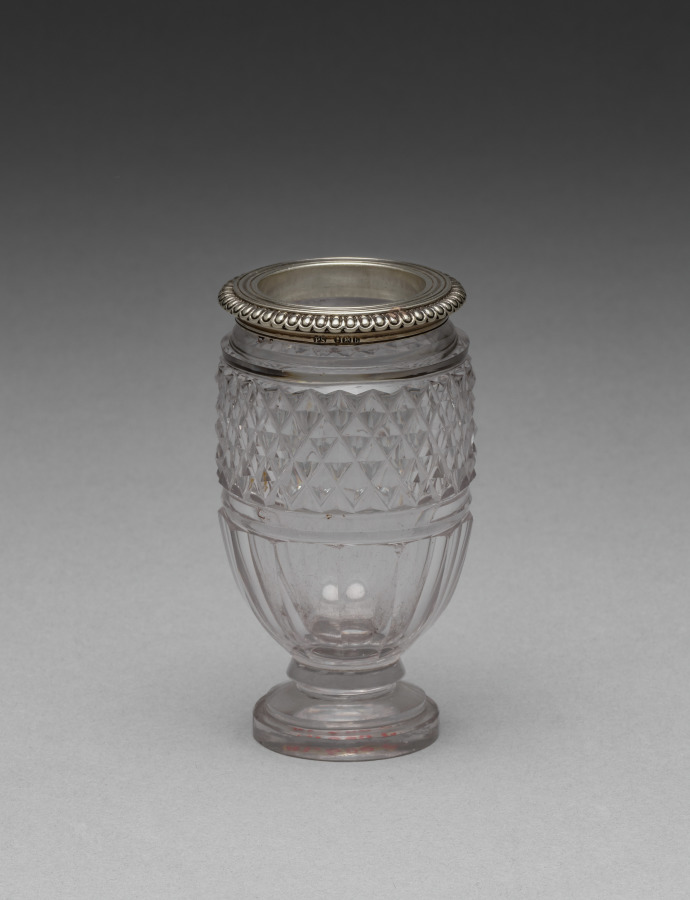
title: Pot (2 of 2)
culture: England, 19th century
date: 1817–18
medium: cut glass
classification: Glass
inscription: Stamped on rim: "PS", George III duty mark, Lion Passant, "b".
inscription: Scratched on base of vessel: "3136".